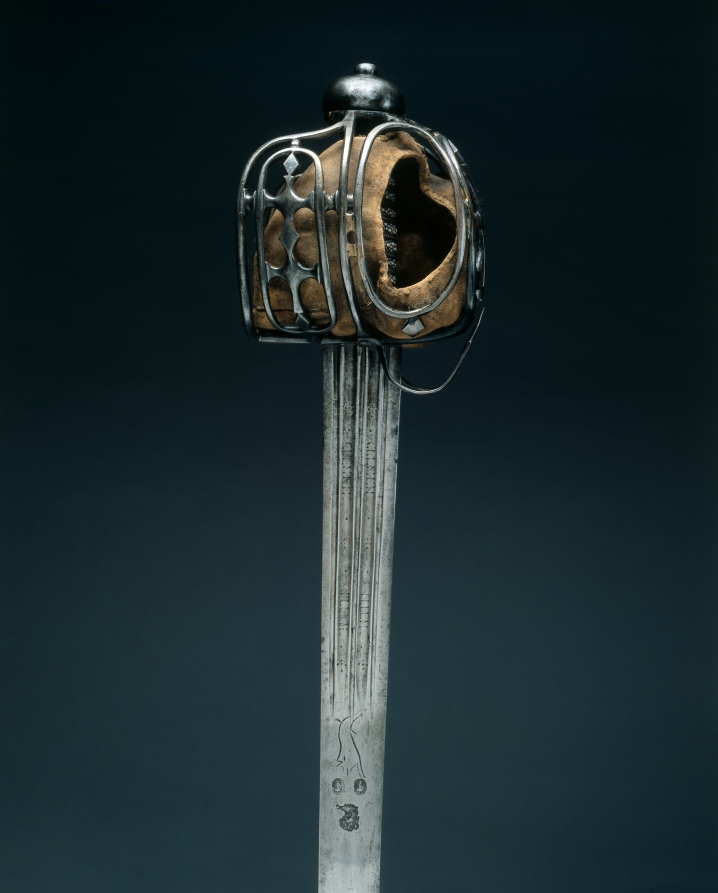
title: Basket-Hilted Broadsword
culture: hilt: Scotland; blade: Germany, Solingen, hilt: 18th Century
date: Hilt: c. 1720, Blade: early 1700s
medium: steel; liner of buff leather; grip of wood, copper wire and fishskin (ray?)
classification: Arms and Armor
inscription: CLEMENS WILLEMS ME FECIT SOLINGEN